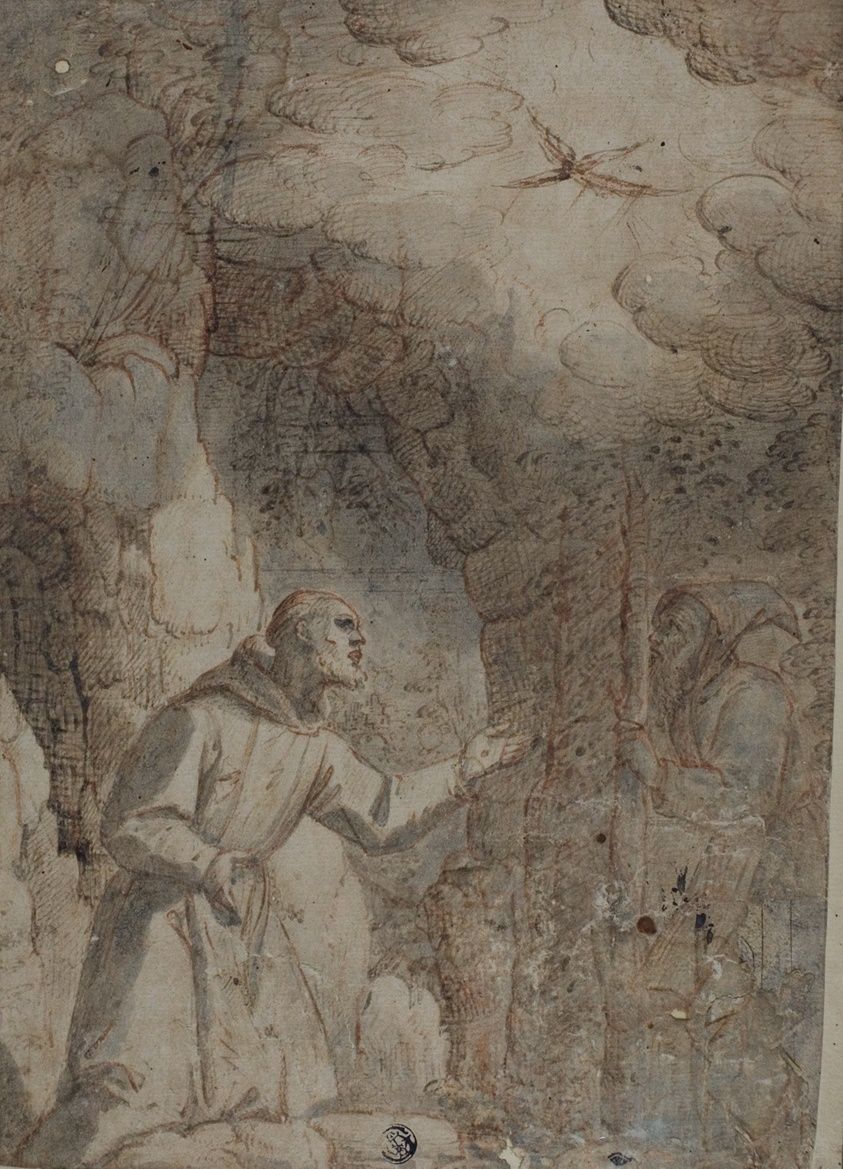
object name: Drawing and Watercolor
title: Stigmatization of Saint Francis of Assisi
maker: probably Italian; Late 16th Century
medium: Red chalk and pen and brown ink, with brush and brown and gray wash, and touches of black chalk, on tan laid paper, laid down on tan laid paper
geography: Italy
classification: chalk with ink; drawings (visual works); prints and drawing